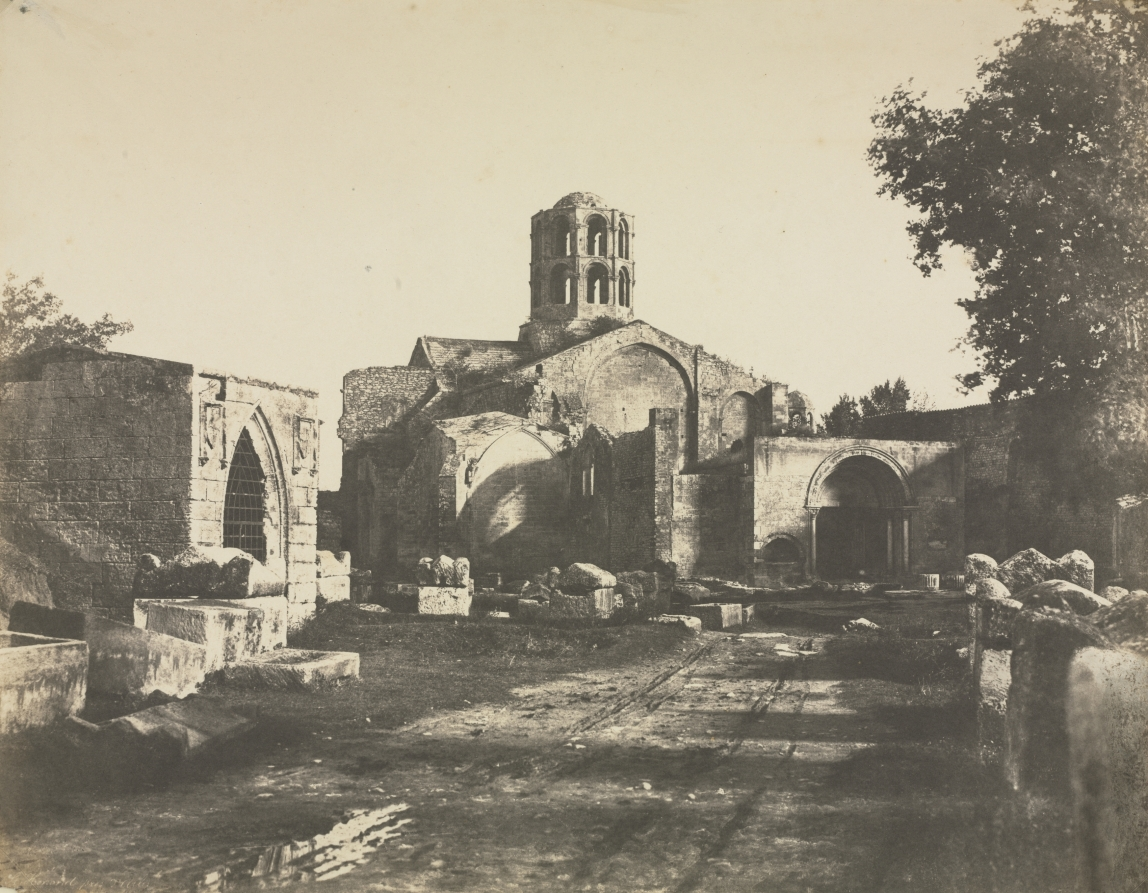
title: Saint-Honorat, Prés d'Arles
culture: France, 19th century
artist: Édouard Baldus (French, 1813–1889)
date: 1853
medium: salt print from waxed paper negative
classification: Photograph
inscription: written in pencil on verso: "Charles Negre Arles St. Honorat.1852 26 (with two slashes through it and a circle around it) 30 (with a circle around it)"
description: Two years after his initial photographic trip to Provence, Baldus returned in 1853 to again document some of the region’s most imposing classical and medieval architectural monuments. His genius both as an architectural photographer and as a printer is easily witnessed in this extraordinary photograph taken in Arles. It depicts an ancient cemetery, the Alyscamps, in the foreground, with the unfinished Romanesque Church of Saint Honorat, dominated by its distinctive two-story bell tower, in the background. On this photographic campaign, this image was the rare occasion when Baldus succeeded in his desire to combine a picturesque aesthetic with an interest in the medieval past. Thirty-five years later, in the fall of 1888, Paul Gauguin and Vincent van Gogh made several paintings of the Alyscamps. Dudley P. Allen Fund 2009.5